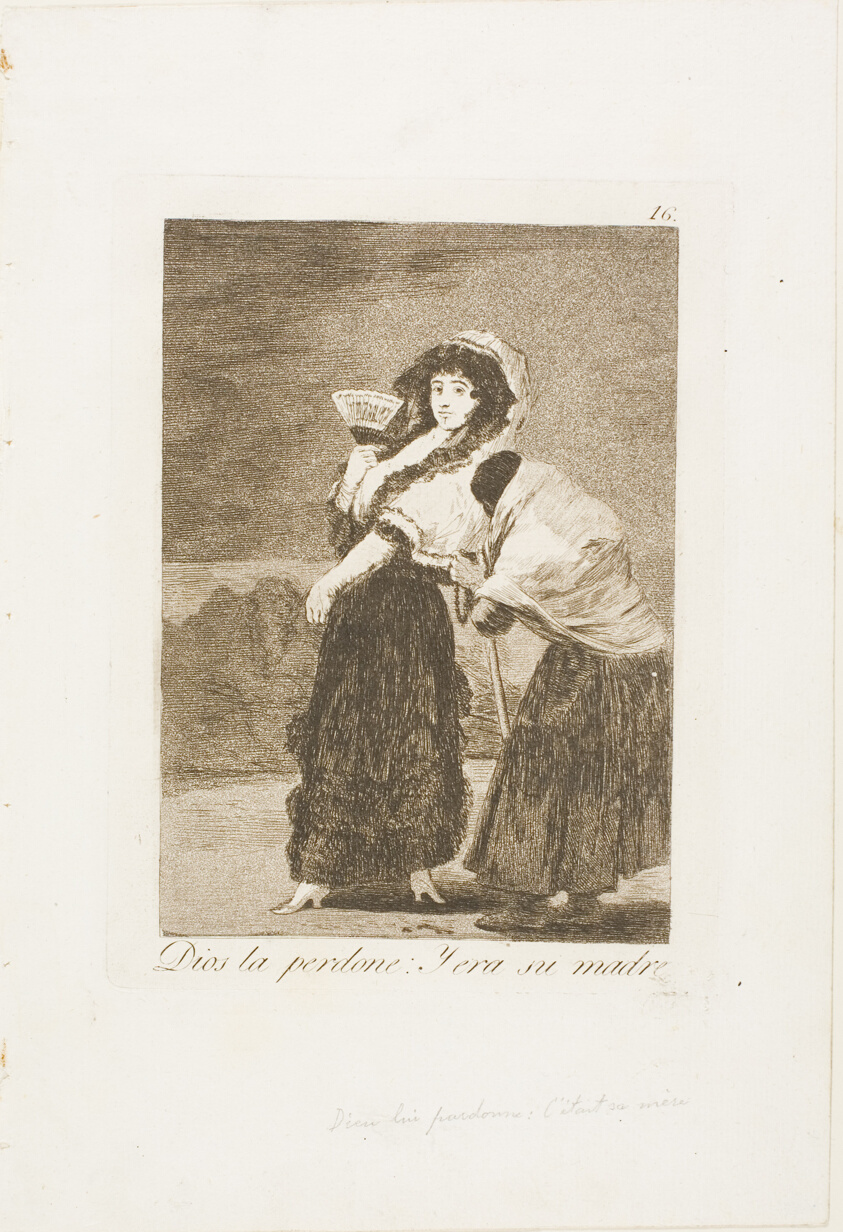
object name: Print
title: For Heaven's Sake: and it was Her Mother, plate 16 from Los Caprichos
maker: Francisco José de Goya y Lucientes (Spanish, 1746-1828)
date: 1797/99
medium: Etching and aquatint on ivory laid paper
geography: Spain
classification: etching; print; prints and drawing